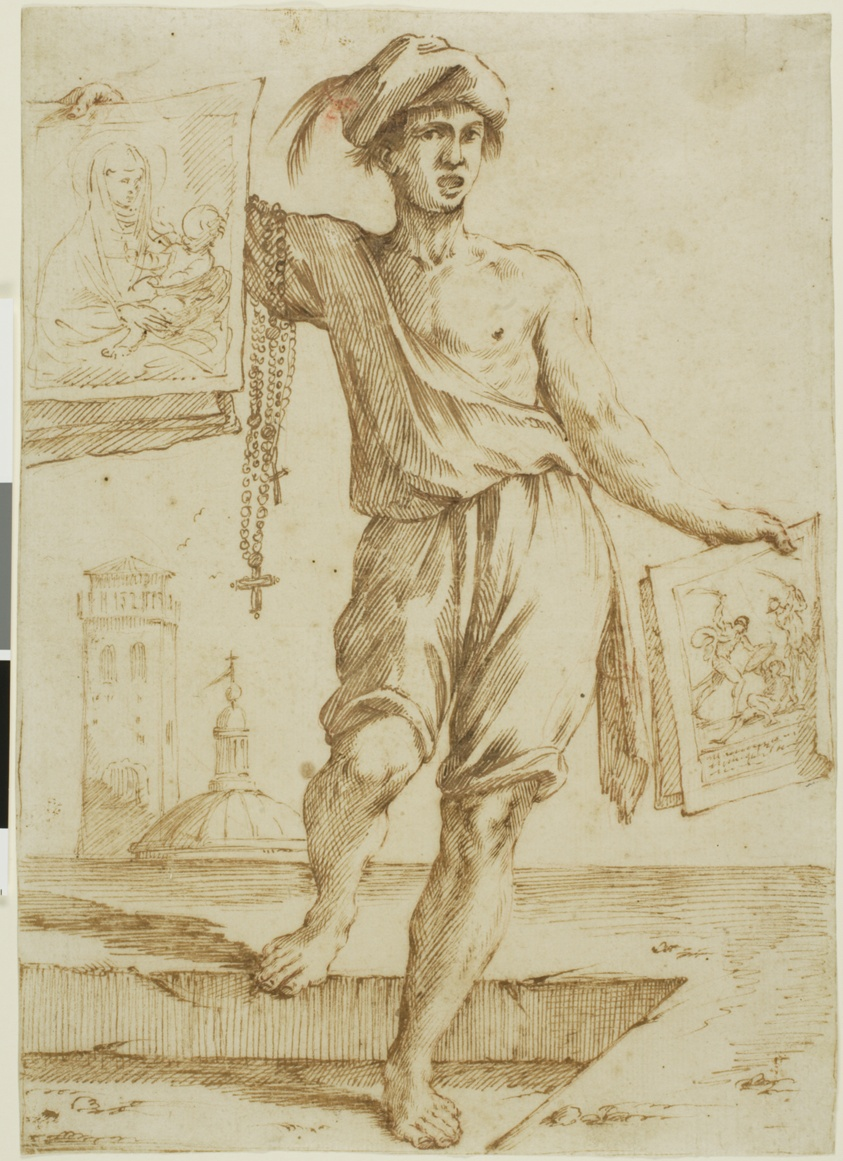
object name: Drawing and Watercolor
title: Vendor of Rosaries and Sacred Images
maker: Giuseppe Maria Mitelli (Italian, 1634-1718)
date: c. 1660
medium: Pen and brown ink, with touches of red chalk, on ivory laid paper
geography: Italy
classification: chalk; prints and drawing; drawings (visual works); pen and ink drawings